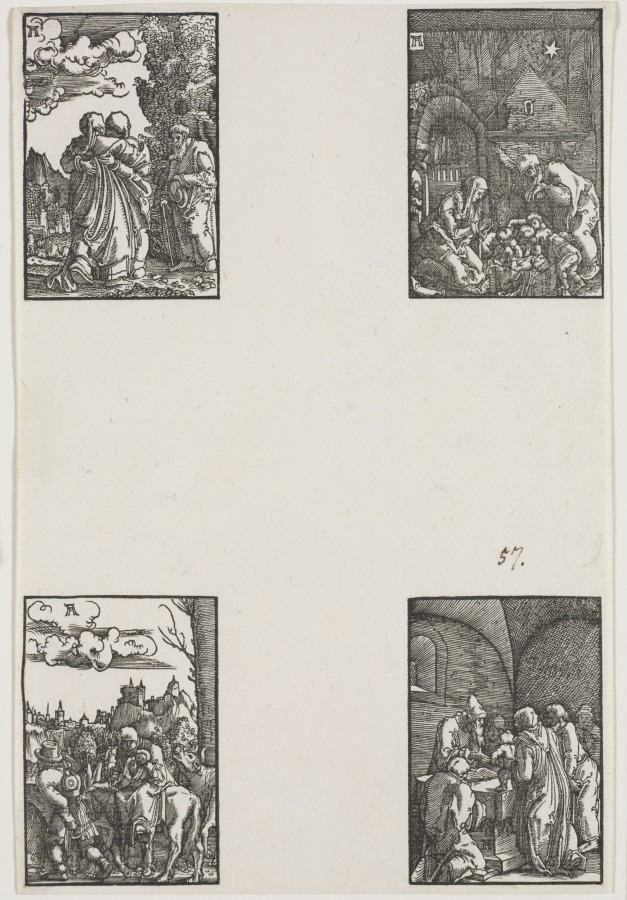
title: The Fall and Redemption of Man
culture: Germany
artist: Albrecht Altdorfer (German, c. 1480–1538)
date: c. 1515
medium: woodcut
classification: Print